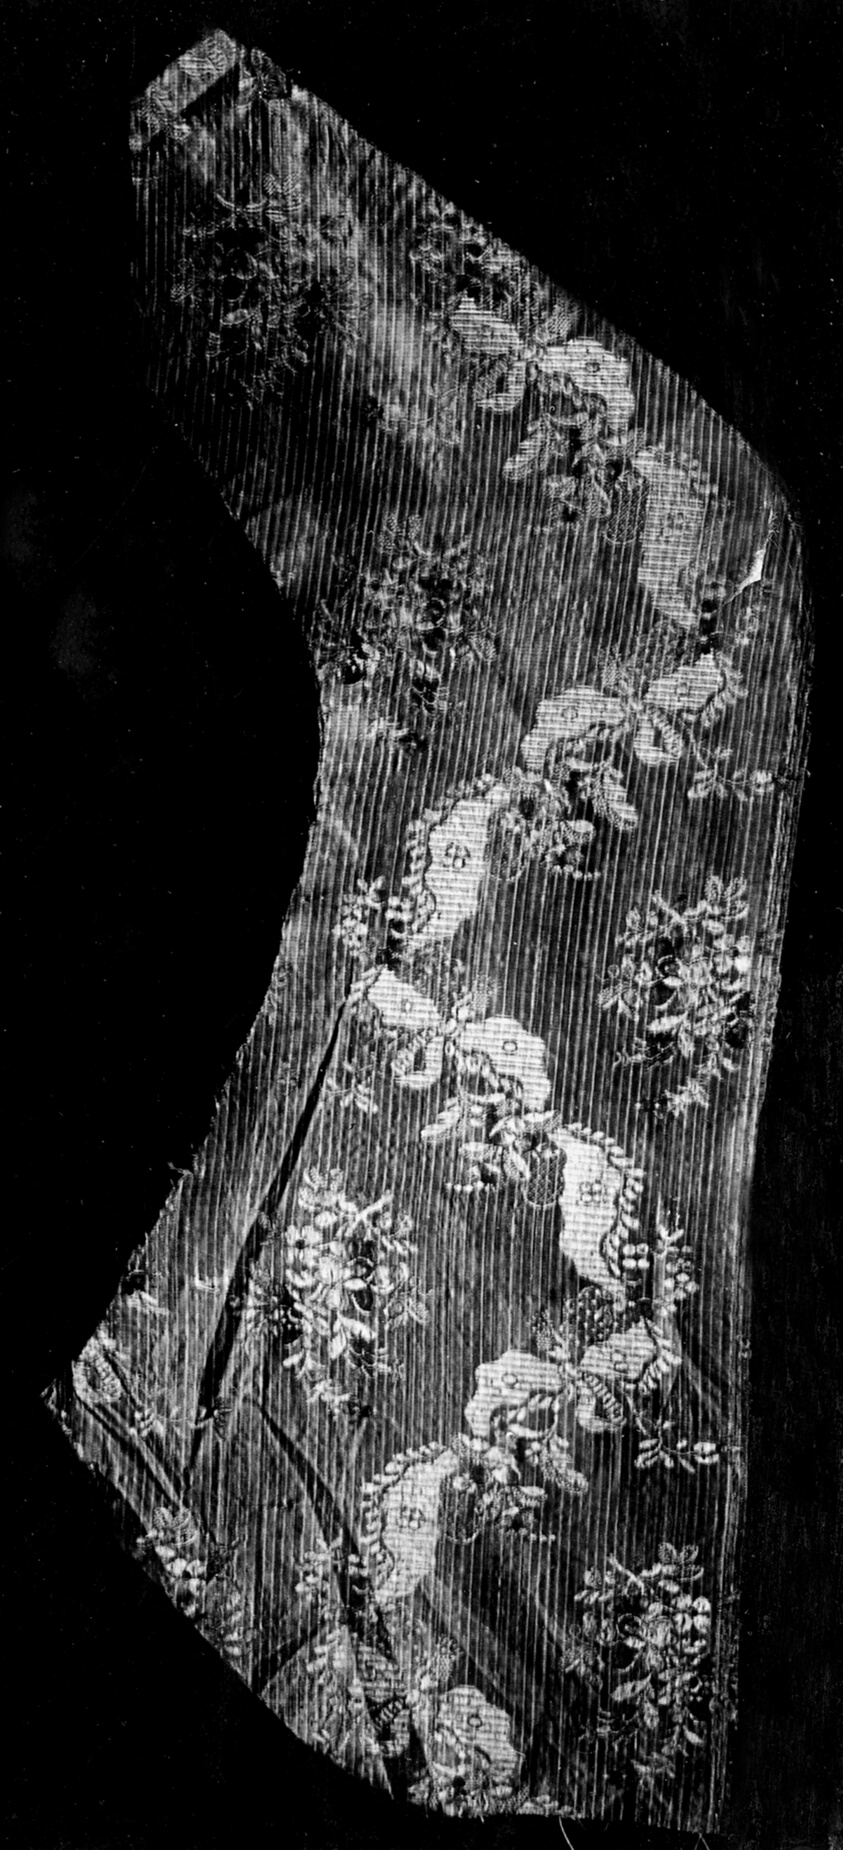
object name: Textile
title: Fragment (Dress Fabric)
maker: France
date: 18th century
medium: Silk, plain compound cloth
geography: France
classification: textile; weaving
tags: flowers, ribbon